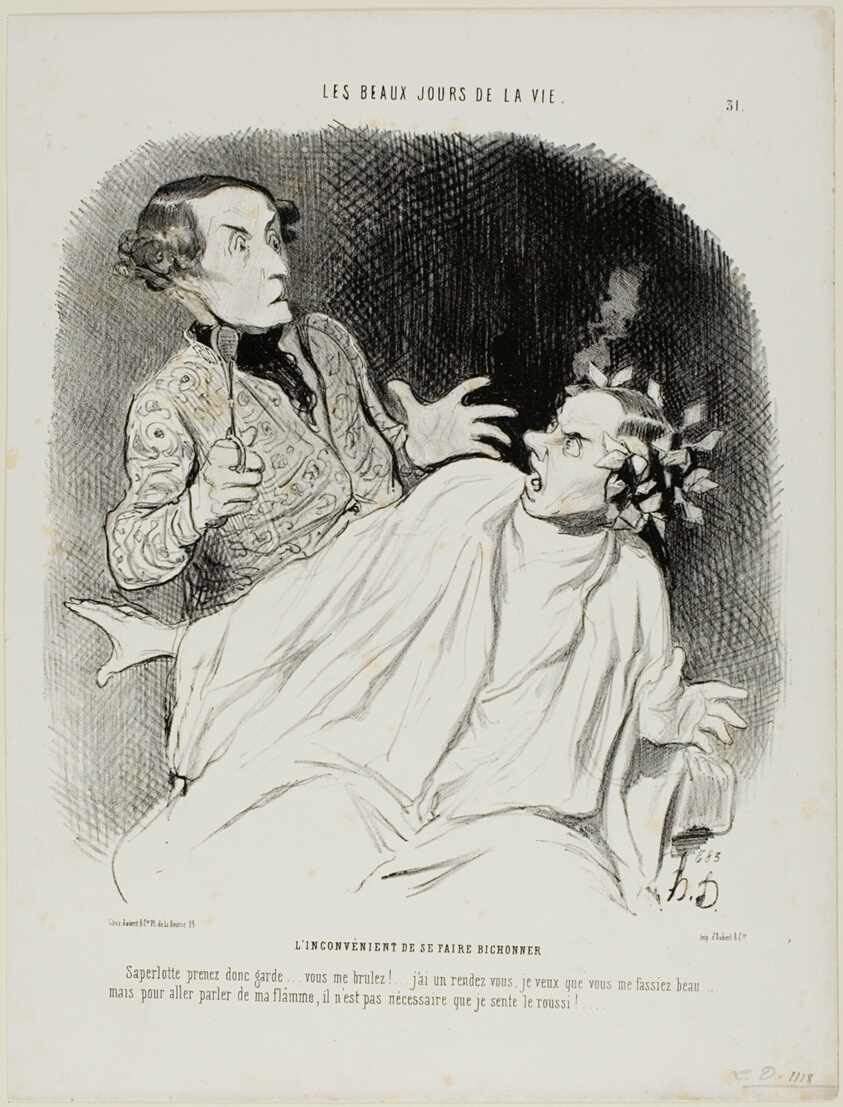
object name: Print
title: The Inconvenience of Having His Hair Curled. “Oh blast.... look here, watch out... you are burning me.... I am meeting someone, and I want you to make me look good....... but in order to declare my burning passion, I don't need to smell scorched!,” plate 31 from Les Beaux Jours De La Vie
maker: Honoré Victorin Daumier; French, 1808-1879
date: 1844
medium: Lithograph in black on white wove paper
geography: France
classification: lithograph; print; prints and drawing